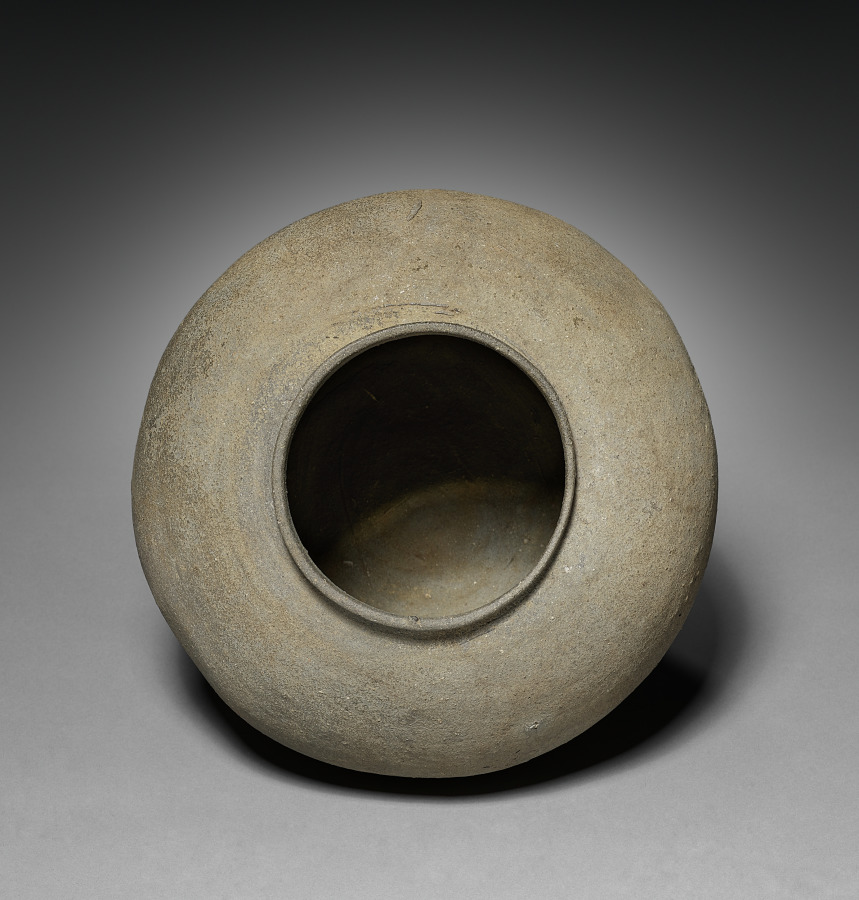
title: Cinerary Urn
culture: Japan, Heian period (794–1185)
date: c. 800–850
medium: stoneware with slight natural ash glaze (Sue ware)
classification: Ceramic